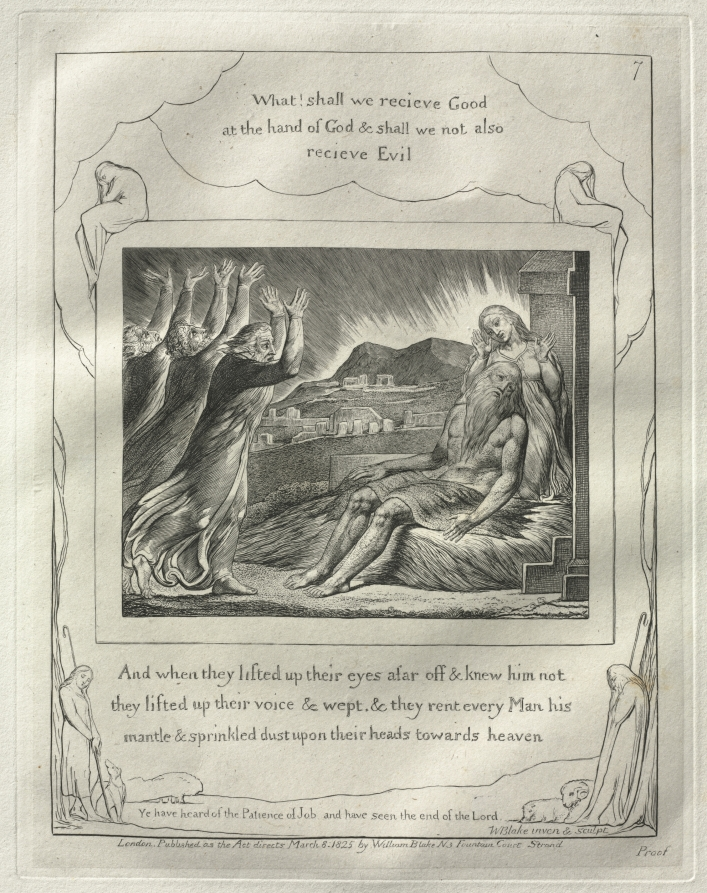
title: The Book of Job: No. 7, And When they had lifted up their eyes afar off and knew him not, they lifted up their voices and wept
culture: England, 19th century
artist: William Blake (British, 1757–1827)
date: 1825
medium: engraving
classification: Print